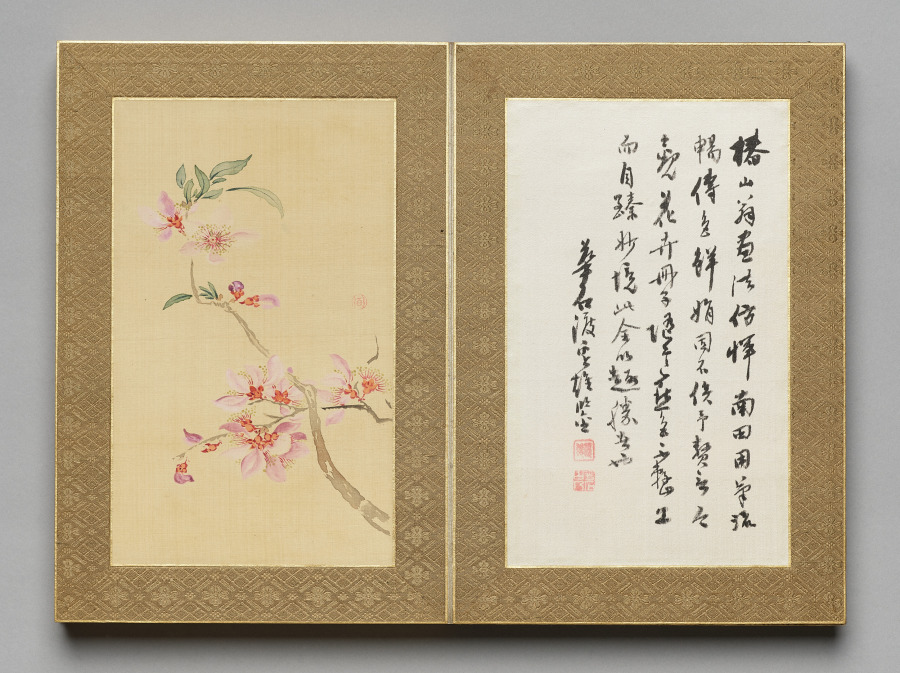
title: Preface from Flowers and Grasses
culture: Japan, Edo period (1615–1868)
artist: Tsubaki Chinzan (Japanese, 1801–1854)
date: 1841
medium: leaf from folding-album; ink on paper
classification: Painting